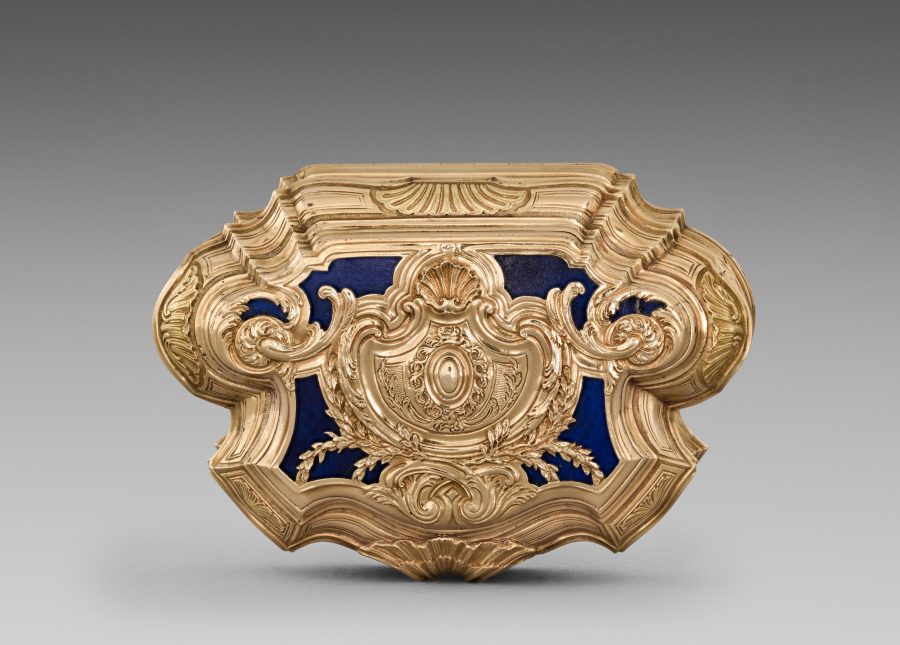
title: Gold Box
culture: France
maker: Juste-Aurèle Meissonnier (French, 1695–1750)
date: 1728–29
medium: gold and lapis lazuli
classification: Metalwork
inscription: IOM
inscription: a crowned M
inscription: a crowned dolphin's head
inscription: a crowned chancellor's mace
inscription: double frame eagle's head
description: With its central cartouche, heavy molding, and fluted sides, the design of this box attests to Juste-Aurèle Meissonnier’s interest in architecture. The box is further distinguished by a strong sense of movement, achieved through its dynamic contour, extraordinary level of detail, and the dramatic contrast between gold and lapis lazuli. Such small boxes, known as snuffboxes, were used to hold scented powdered tobacco that was inhaled through the nostrils. Made of precious materials and highly ornamented, they conveyed the owner’s wealth, fashion awareness, sophistication, and social standing. These personal, collectible items were often presented as luxurious gifts. This box was made for the dowager Queen of Spain, Maria Anna of Neuburg, whose coat of arms – along with that of her late husband, Charles II – features on the cover.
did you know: This is one of the two known objects that bear the maker's mark of Meissonnier.